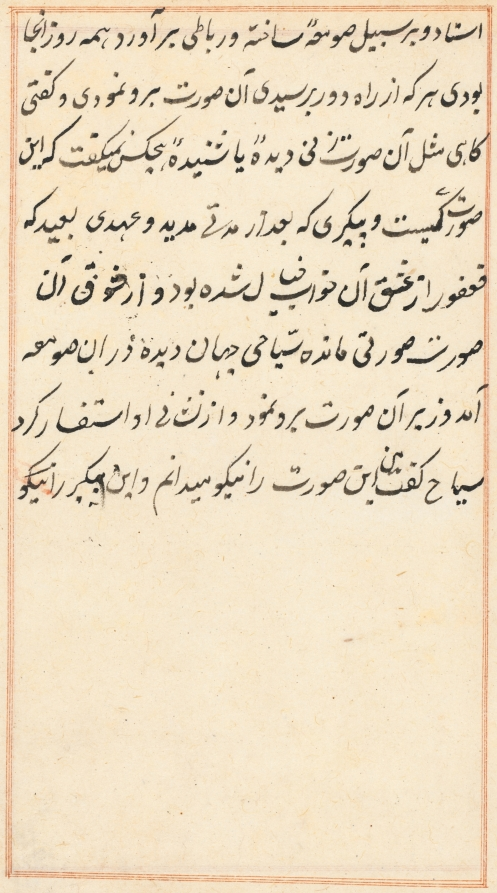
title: Page from Tales of a Parrot (Tuti-nama): text page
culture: Mughal India, court of Akbar (reigned 1556–1605)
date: c. 1517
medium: gum tempera, ink, and gold on paper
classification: Painting